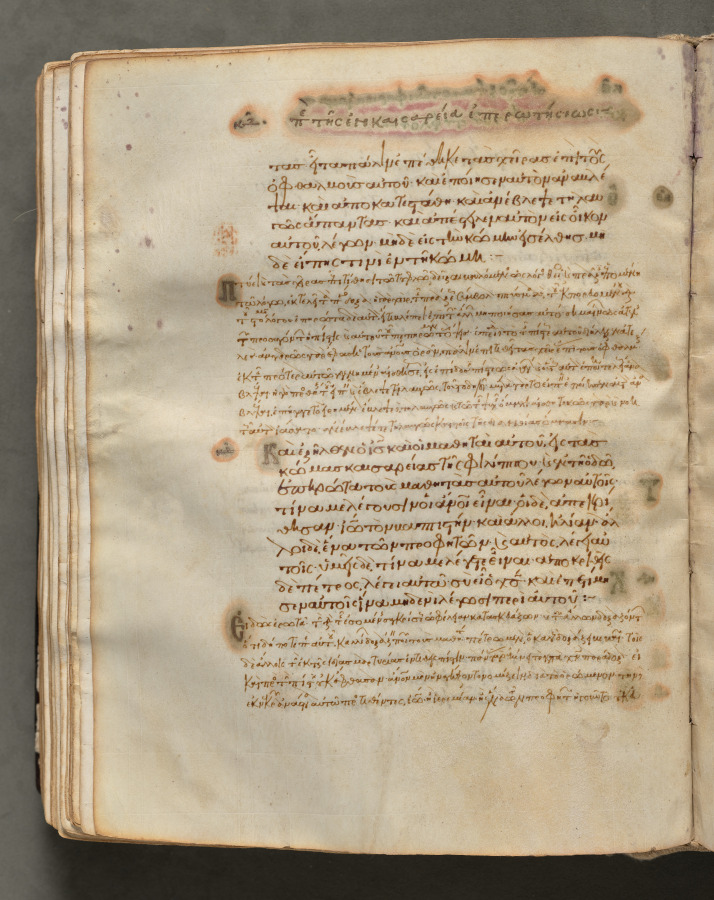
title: Text, folio 158 (verso), from a Gospel Book with Commentaries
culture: Byzantium, Constantinople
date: c. 1000–1100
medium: ink, tempera, and gold on vellum; leather binding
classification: Bound Volume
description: Each of the four gospels in this book opens on a page with brilliantly illuminated borders depicting the author of the text as well as birds-principally peacocks, symbols of the immortality of the soul-and fountains, representing the fountain of life and the salvation of the soul. This volume consists of 428 leaves with texts in Greek. Its level of sophistication suggests that it was probably written and decorated in a monastery in Constantinople.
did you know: Gospel Books were carried in procession through Byzantine churches.